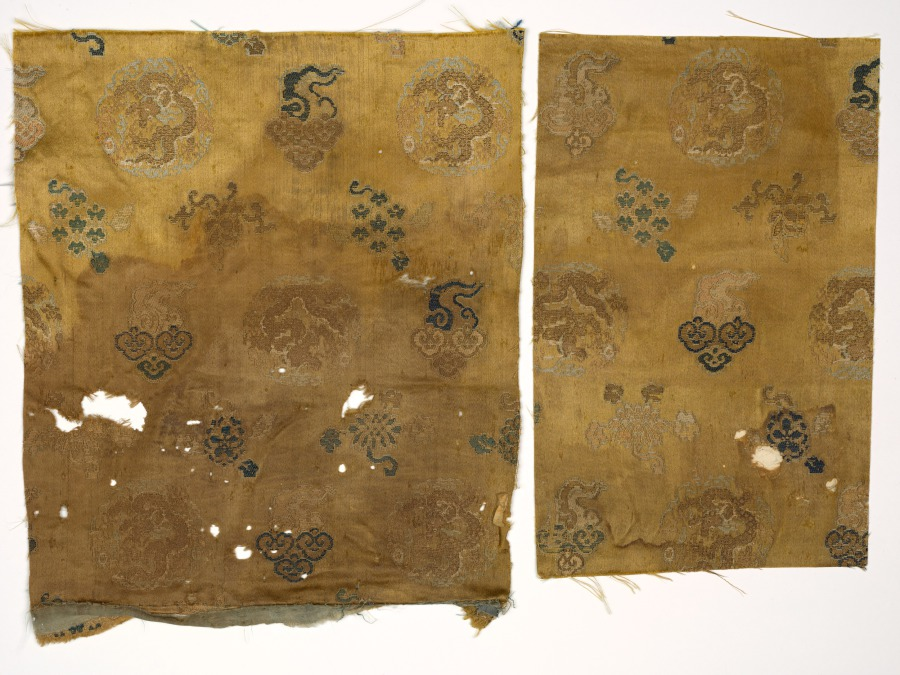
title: Fragments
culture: China, 18th century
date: 1700s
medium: brocaded satin, silk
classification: Textile